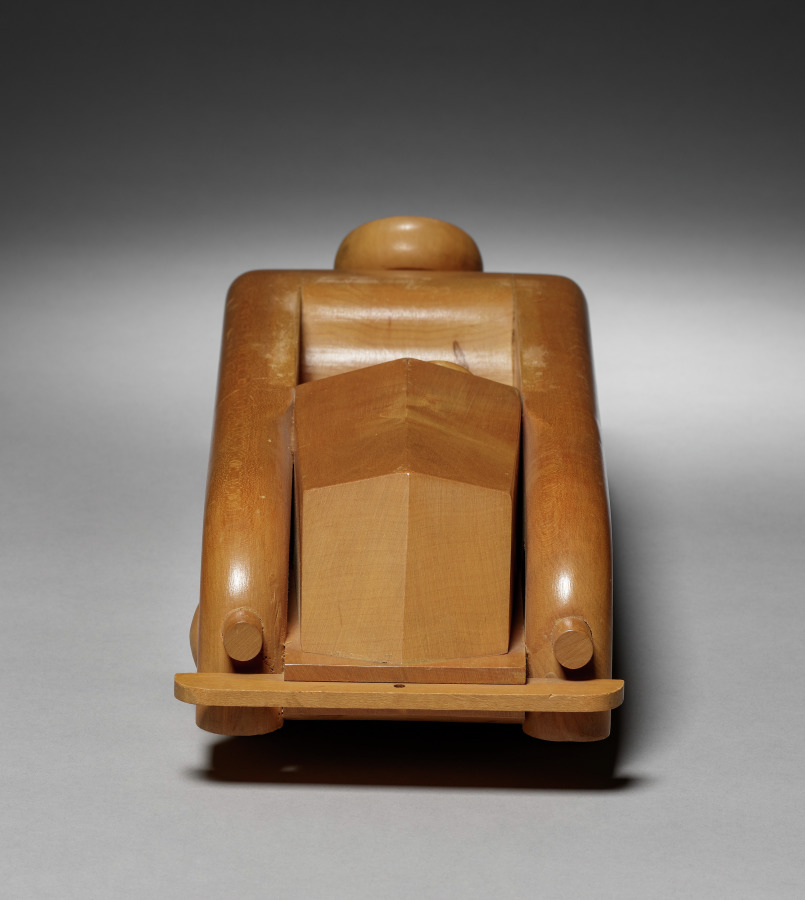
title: Streamline Automobile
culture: Denmark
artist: Boysen Toys (Danish)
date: 1900s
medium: wood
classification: Wood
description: Credit line: John D. Rockefeller General Education Board Grant II